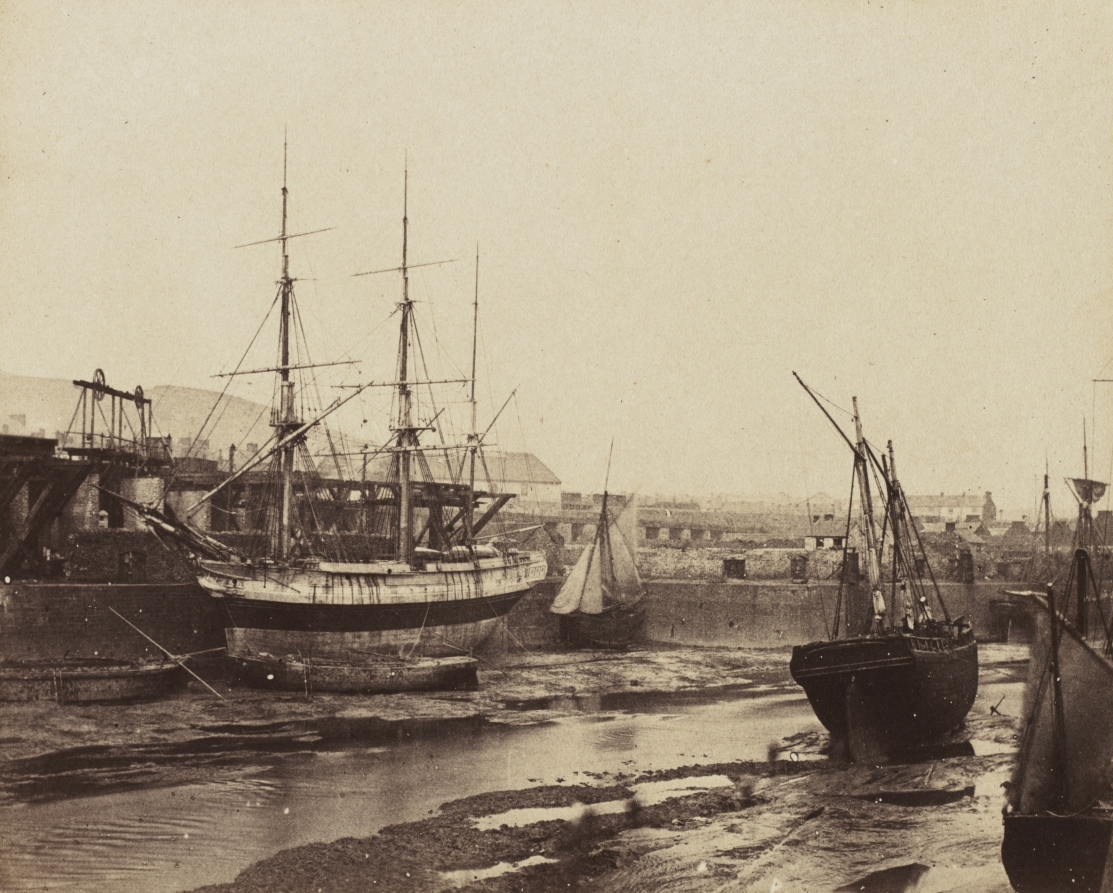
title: Harbour, Swansea, Wales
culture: England, 19th century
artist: Alfred Rosling (British, 1802-c. 1880s)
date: 1855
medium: albumen print from wax paper negative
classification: Photograph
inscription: Written in pencil on verso: "F489"; "ROSLING, FLOAT AT SWANSEA"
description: A successful timber merchant in the Hackney area of London and photographer, Alfred Rosling is known for several bodies of photographic work. His earliest photographs were made for a stereoscope establishment, but he later became interested in taking landscape photographs and became very well connected with many British photographic circles. In addition to picturesque views of Surrey, he spent time in South Wales where Harbor, Swansea, Wales was taken. There he met John Dillwyn Llewelyn and likely the Reverend Calvert Richard Jones, Jr., as well as others in the Swansea photographic circle. His son-in-law, Frances Frith, published a number of Rosling's landscape prints.